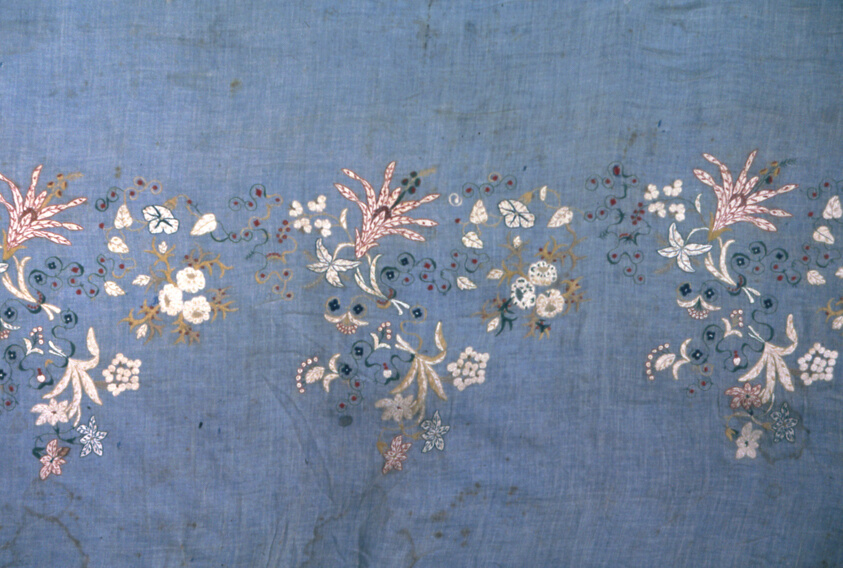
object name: Textile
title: Panel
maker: France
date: 1830/40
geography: France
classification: textile; needlework (visual works); embroidery